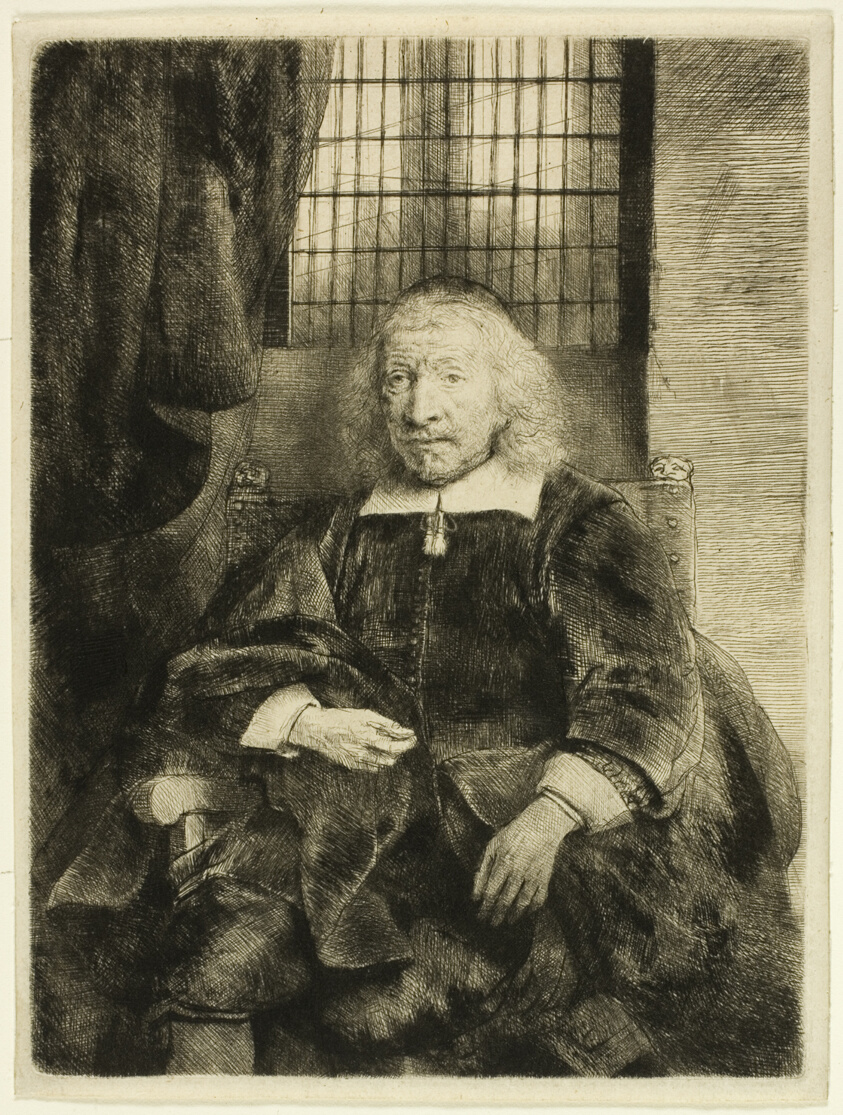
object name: Print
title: Thomas Haaringh (Old Haaringh)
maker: Rembrandt van Rijn (Dutch, 1606-1669)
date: c. 1655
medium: Etching and drypoint on paper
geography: Holland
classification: etching; print; prints and drawing; paper; drypoint